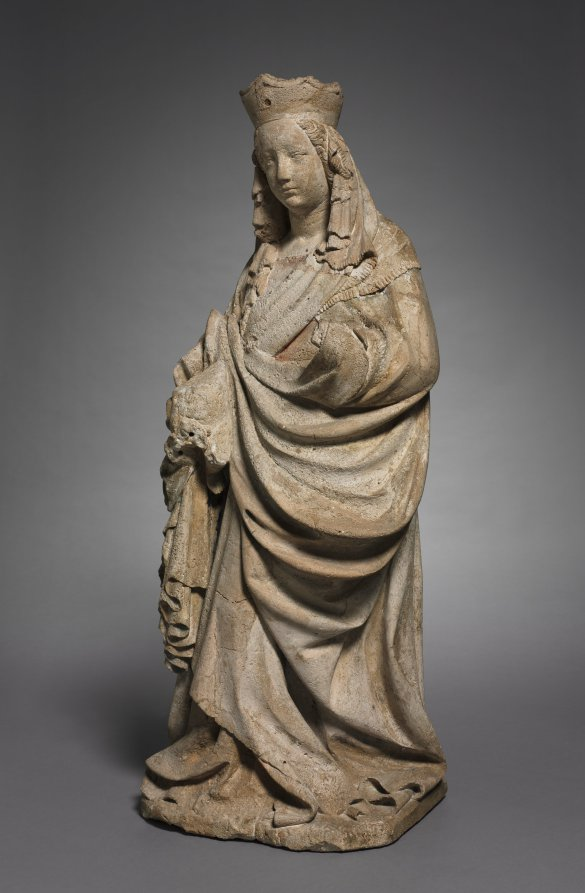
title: Virgin and Child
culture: Austria, Lungau, Church of Mariapfarr, late 14th century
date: c. 1395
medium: cast stone with traces of original paint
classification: Sculpture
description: This sculpture—damaged during the 1800s and now missing the figure of the Christ child—is a fine early example of the type known as the Schöne Madonna or "Beautiful Virgin." This type became popular around 1400 and emphasized the graceful curve of the Virgin’s posture combined with deep, slightly exaggerated drapery folds. This sculpture is known to have come from the Church of Mariapfarr in the Diocese of Salzburg. It was made using a casting technique known as "lost shape." The casting consisted of pulverized limestone combined with quicklime and milk curd poured into a mold. After the cementlike mixture set for several weeks, the mold was destroyed to remove the sculpture, which could then be filed, polished, and painted.